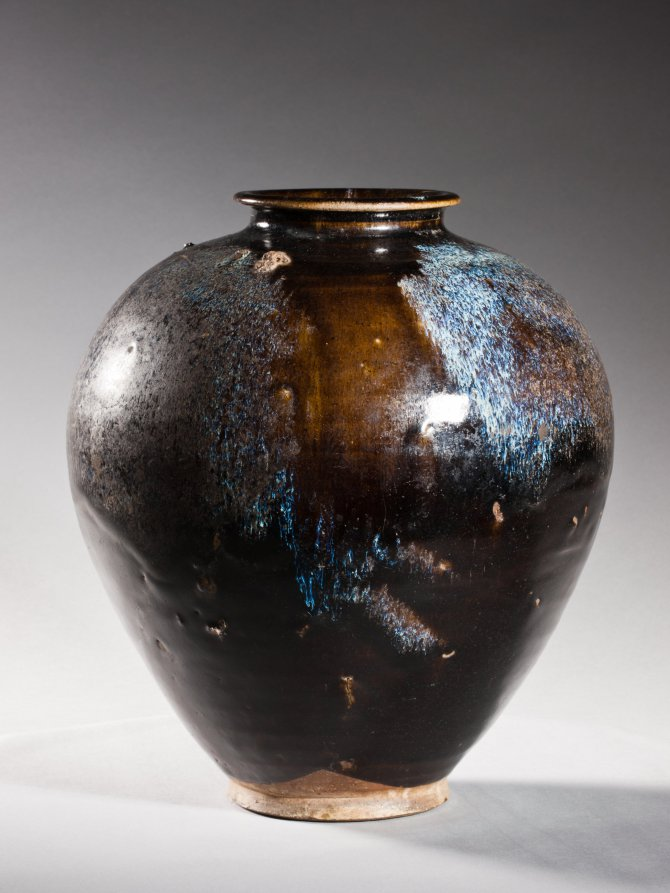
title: Jar: Black Ware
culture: China, Henan province, Huangdao kilns, Tang dynasty (618-907)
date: 700s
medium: glazed stoneware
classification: Ceramic